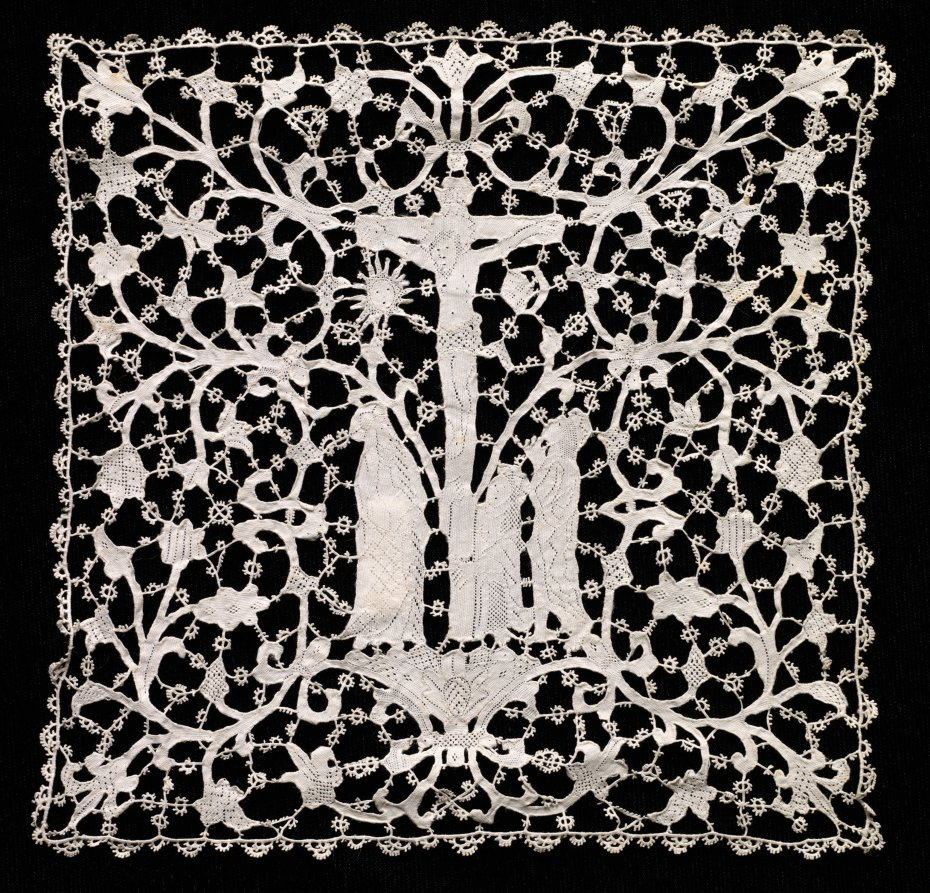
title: Lace Ecclesiastical Square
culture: Italy, Venice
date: 1600s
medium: Needle lace (Venetian flat point)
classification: Lace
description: This ecclesiastical square features the crucifixion with Mary and St. John. Above them is the sun and moon, a reference to earlier iconography.